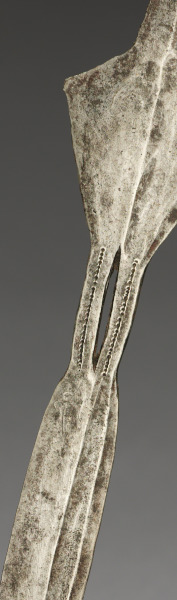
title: Knife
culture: Africa, Central Africa, Democratic Republic of the Congo or Central African Republic, unknown maker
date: before 1916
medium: forged iron and copper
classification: Arms and Armor